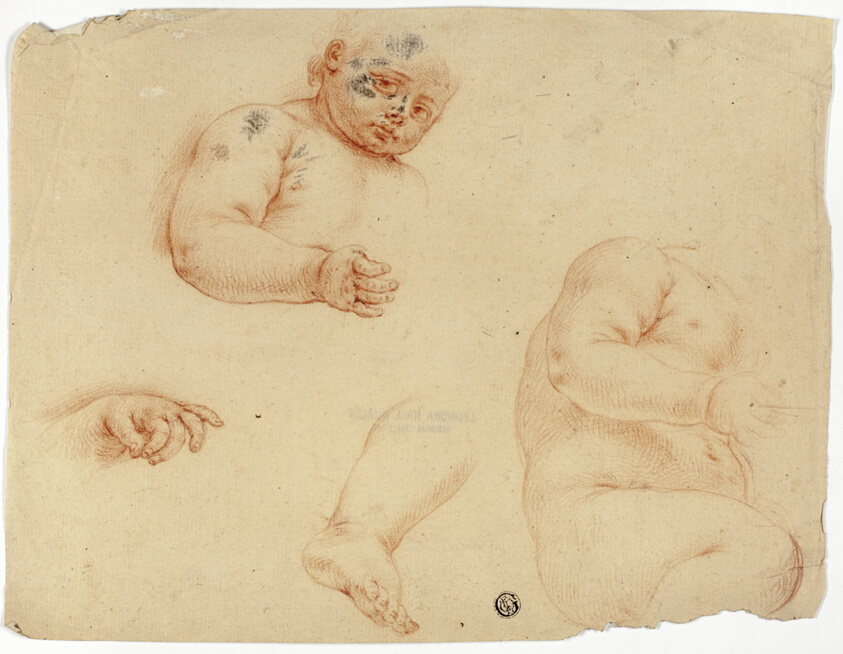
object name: Drawing and Watercolor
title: Sketches of a Child: Half-Length, Torso, Foot, Hand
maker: Unknown Artist; Italian, 1700-1799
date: 1700/1799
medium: Red chalk, heightened with touches of lead white (discolored), on cream laid paper, prepared with a red chalk wash ground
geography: Italy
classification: chalk; drawings (visual works); prints and drawing